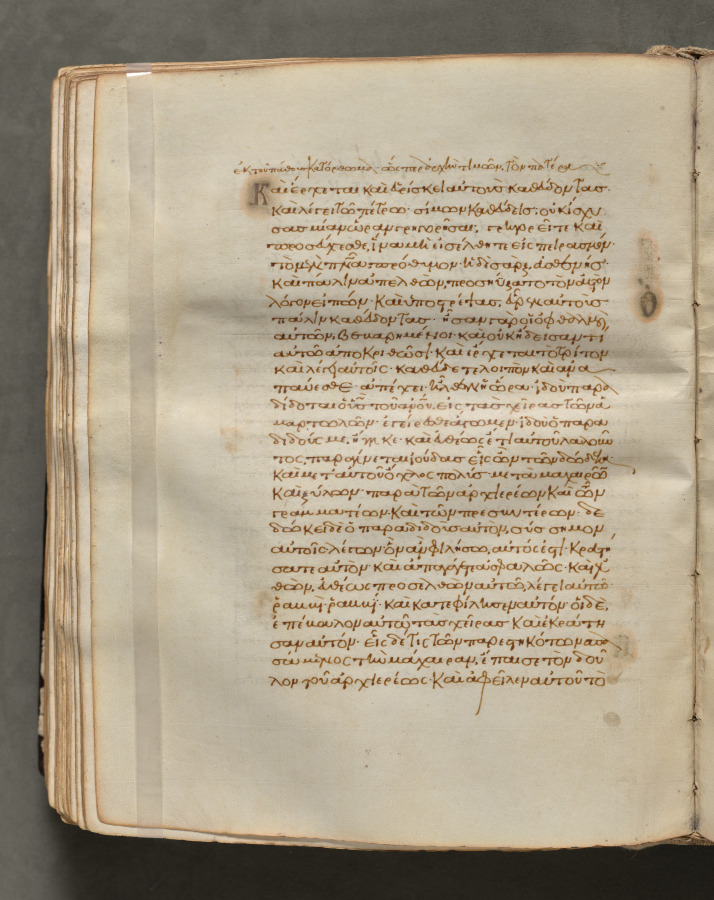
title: Text, folio 190 (verso), from a Gospel Book with Commentaries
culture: Byzantium, Constantinople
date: c. 1000–1100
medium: ink, tempera, and gold on vellum; leather binding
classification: Bound Volume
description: Each of the four gospels in this book opens on a page with brilliantly illuminated borders depicting the author of the text as well as birds-principally peacocks, symbols of the immortality of the soul-and fountains, representing the fountain of life and the salvation of the soul. This volume consists of 428 leaves with texts in Greek. Its level of sophistication suggests that it was probably written and decorated in a monastery in Constantinople.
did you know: Gospel Books were carried in procession through Byzantine churches.